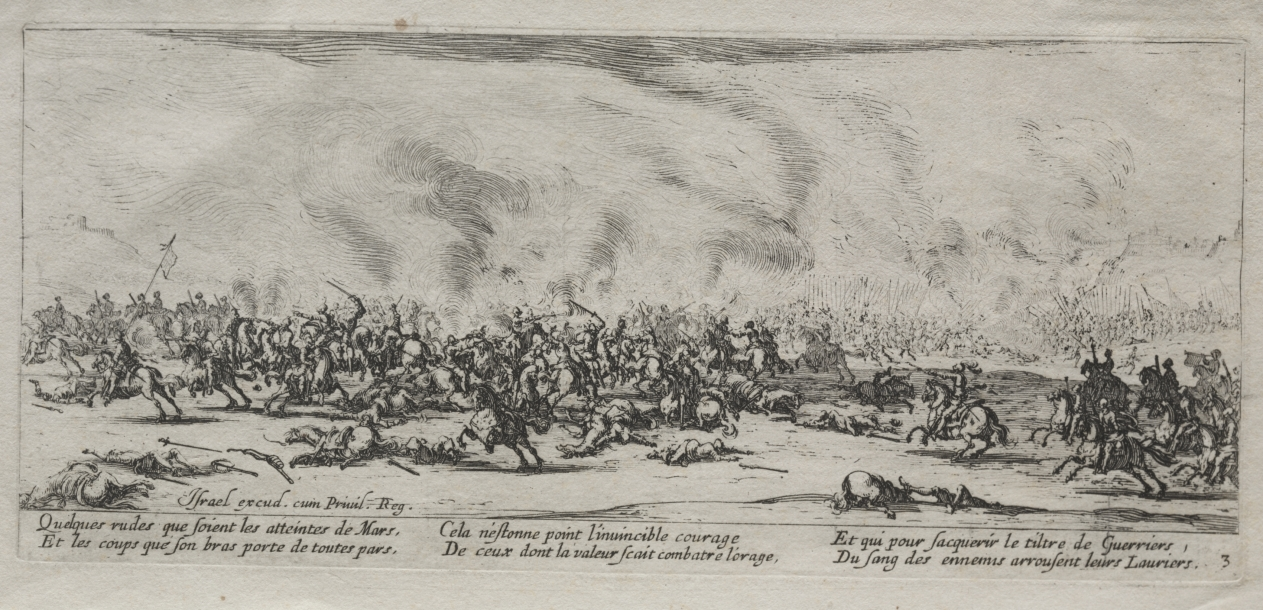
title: The Large Miseries of War: The Battle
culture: France, 17th century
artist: Jacques Callot (French, 1592–1635)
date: 1633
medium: etching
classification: Print